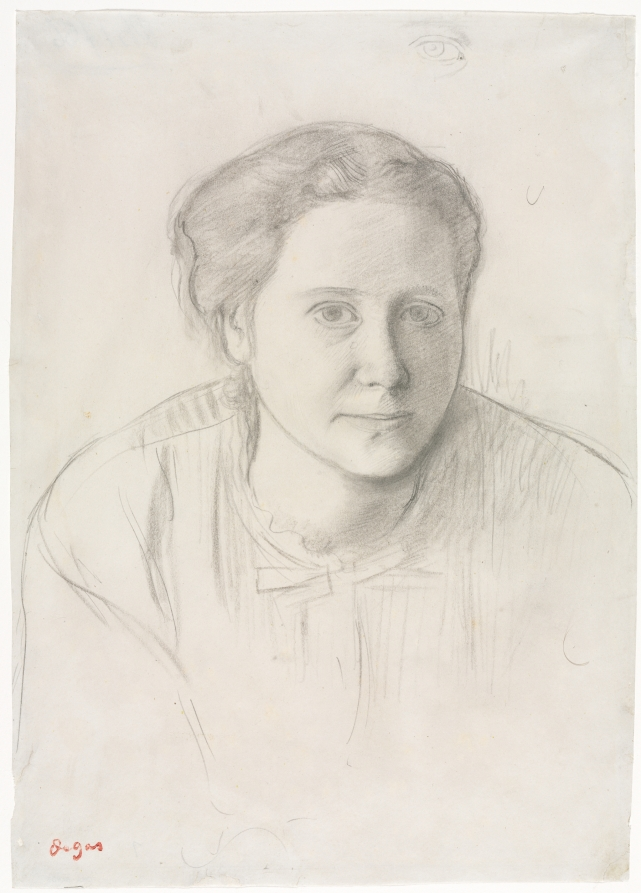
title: Victoria Dubourg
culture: France, 19th century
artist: Edgar Degas (French, 1834–1917)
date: c. 1866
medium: graphite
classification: Drawing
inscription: verso, upper right, in blue crayon: Ph 1756 [underlined]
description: This drawing is one of several studies that Edgar Degas created for a painted portrait of the artist Victoria Dubourg, now in the collection of the Toledo Museum of Art. Here, Degas concentrated on the facial expression of Dubourg, known for her still-lifes of flowers. Attempting to precisely render Dubourg's direct gaze, Degas drew her eyes in greater detail, even adding an additional sketch along the sheet's upper margin.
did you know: Around the time this drawing was made, its subject, Victoria Dubourg, became engaged to the artist Henri Fantin-Latour, also a friend of Degas.